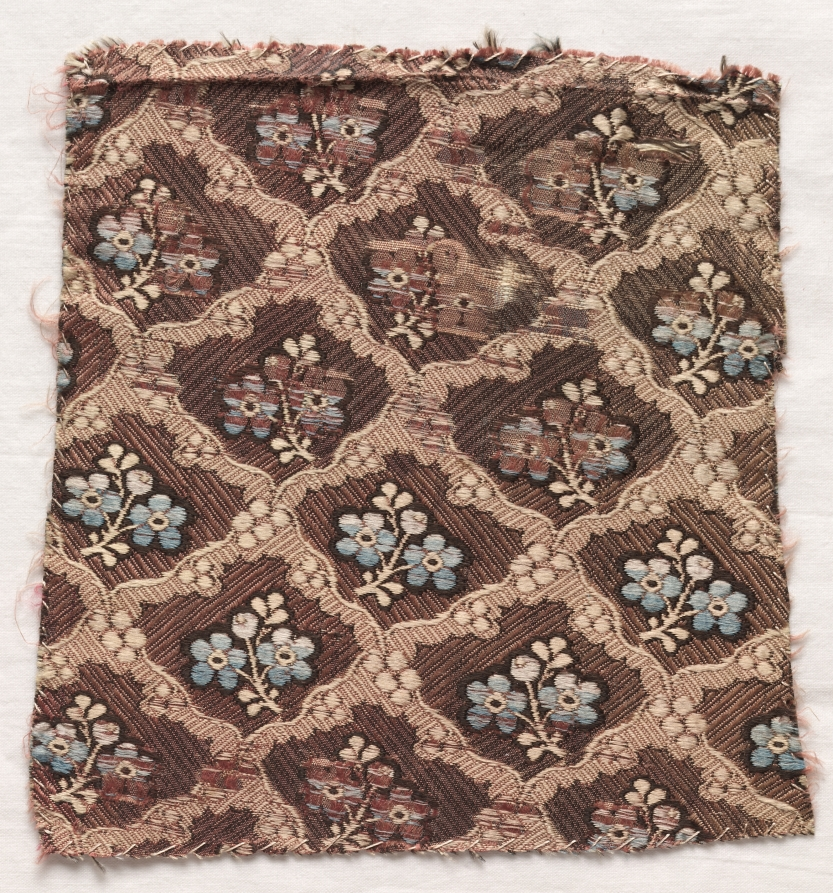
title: Textile Fragment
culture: France, 18th century, Period of Louis XVI (1774-1793)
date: 1774–1793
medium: Droguets Lisèrés; silk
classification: Textile